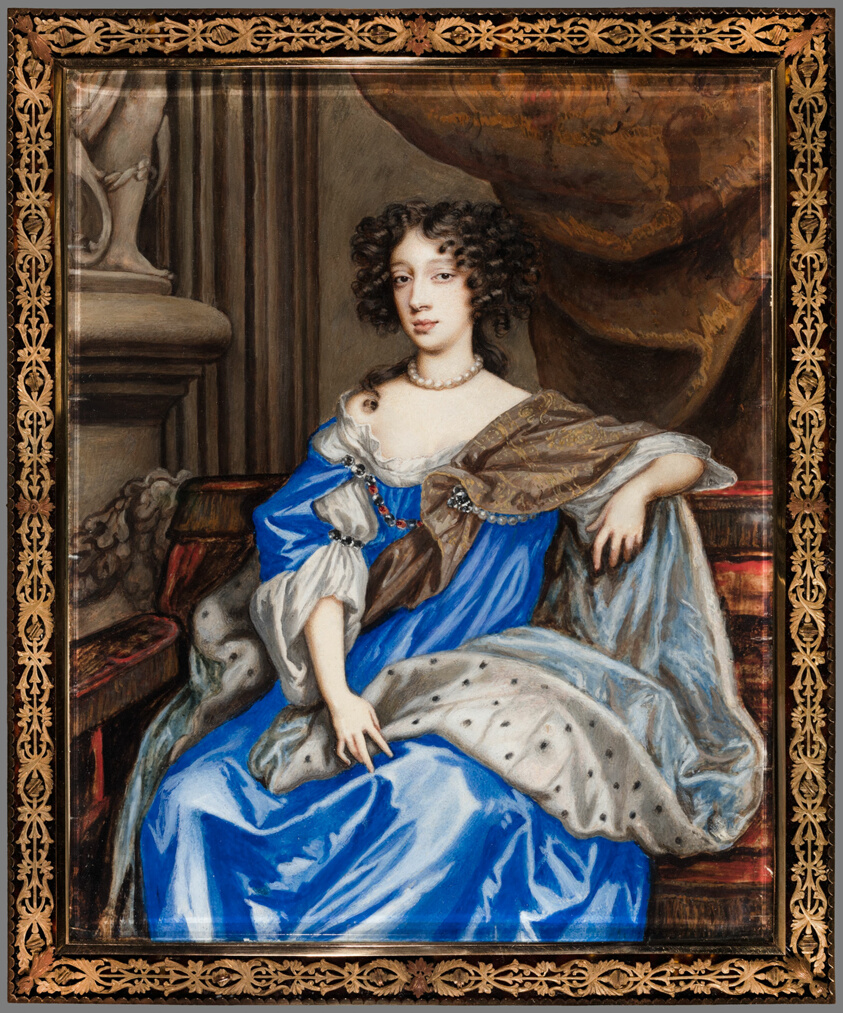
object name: Miniature Painting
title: Portrait of Mary of Modena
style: 17th Century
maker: Attributed to Nicholas Dixon (English, c. 1645–after 1708)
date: c. 1673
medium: Watercolor on vellum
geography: England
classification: miniature painting; european decorative arts; european painting; miniature; portrait; portrait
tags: portrait, woman, royalty, portraits, blue, blue (color), curtains, interior, jewelry, necklace, pearls, portraits: female subject, royal, sculpture, wealth, white (color), woman